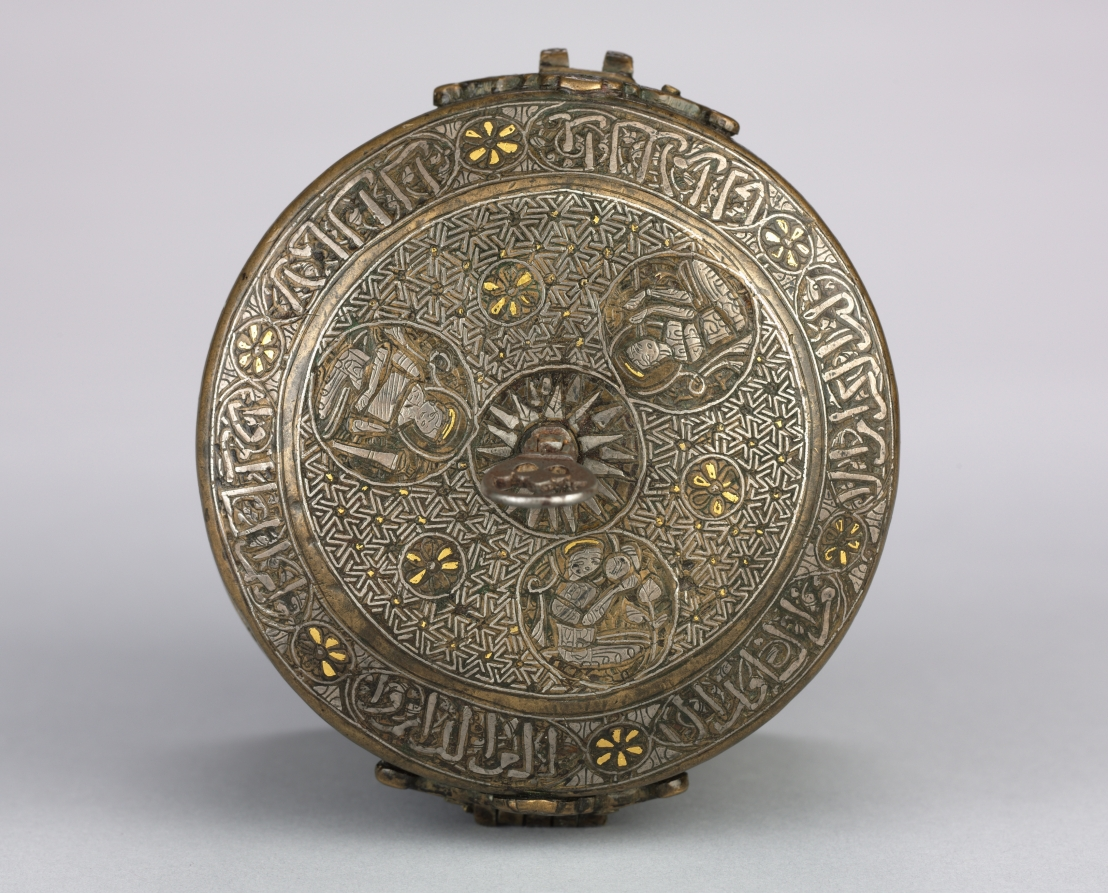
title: Luxury Inlaid Container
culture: Northern Iraq, Ayyubid period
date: c. 1250–1350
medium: sheet brass, inlaid with silver and gold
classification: Metalwork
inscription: Band around body (naskh): "Lasting glory, and safe life, and increasing prosperity, [and] nobility, [and] effective authority"; band around body (naskh): "Brilliance, and nobility, and patience, and modesty, and glory, and long life, and piety, and patience"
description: Metalwork flourished in the 1200s with production centers in Mosul, Damascus, and eastern Anatolia. Along with this container, the nearby ewer and candlestick are examples of the superb pieces produced at this time. Scenes of court life, including banqueting, music, and enthroned figures, decorate the sides and top of the container. The lid is covered in hexagonal swastikas, an ancient solar motif, which is further enhanced by a large sunburst in the center. The calligraphic inscriptions extend wishes for a long life, prosperity, and patience to the owner.